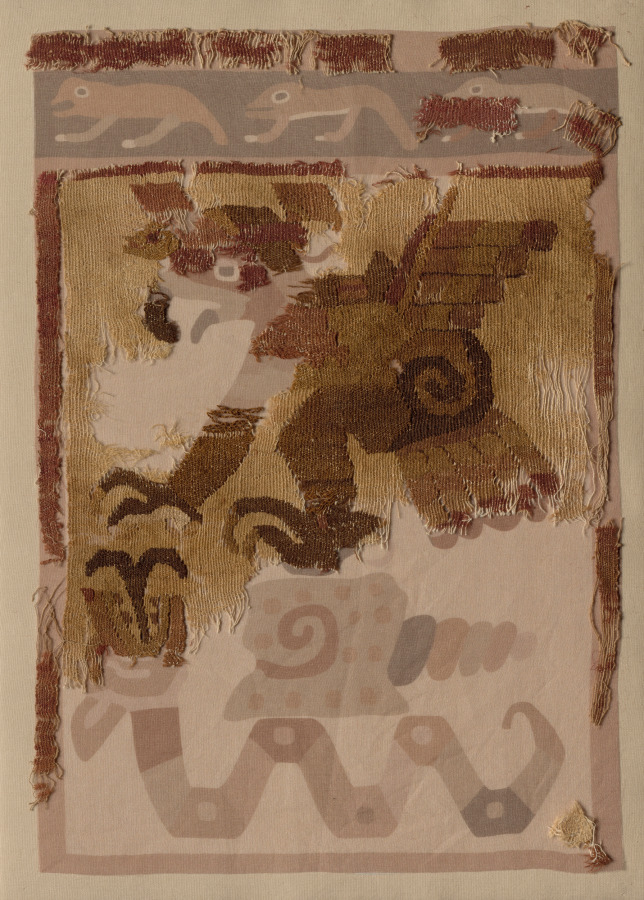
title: Textile Fragment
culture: Peru, Moche, north coast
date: c. 50–650 CE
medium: cotton and camelid fiber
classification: Textile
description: This fragment, one of several in the collection, is a rare survivor of catastrophic rains that destroyed much of the Moche textile legacy and may have helped to bring about the decline of Moche culture. It depicts a serpent and a snail beneath a hovering raptorial bird—perhaps a snail kite, a type of hawk named after its favored food. The size of the motifs implies that the original textile was large; a mantle (a shawl-like garment) or a hanging are among the possibilities.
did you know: This fragment is a rare survivor of floods that destroyed much of the Moche textile record.